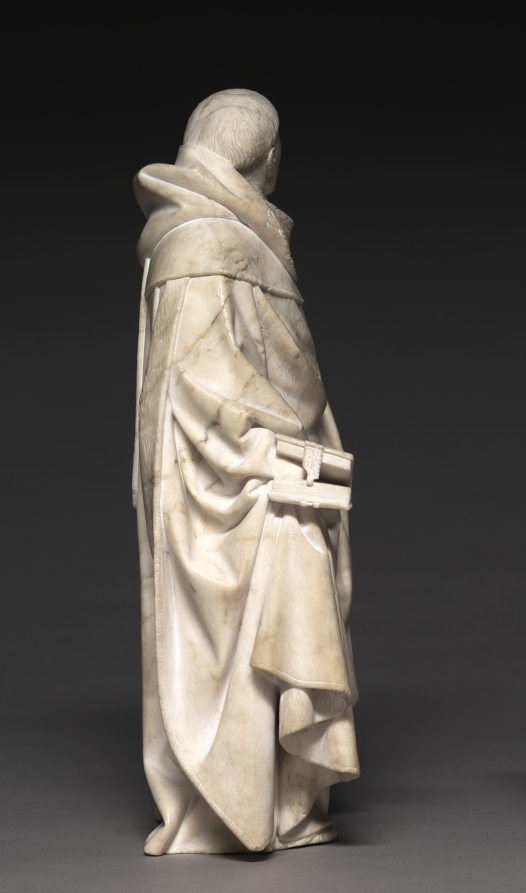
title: Mourner from the Tomb of John the Fearless and Margaret of Bavaria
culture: Spanish, Burgundy, Dijon, 15th century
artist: Jean de la Huerta (Spanish, active Burgundy, 1431–62)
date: 1443–45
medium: salins alabaster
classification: Sculpture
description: This monklike figure has a variously textured monochrome surface. Alabaster’s softness made it easy to carve details like the fabric and fur of the mourner’s robe and the codex pages in his hand. This is one of 40 mourners from an elaborate funeral procession beneath an intricately carved alabaster arcade. This mourner comes from the monastery of Champmol near Dijon, which became a primary burial place for Burgundian dukes. The sculpture was part of the tomb of John the Fearless (1371–1419), commissioned by his son Philip the Good (1396–1467), modeled after the earlier monument for Philip the Bold.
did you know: A plaster cast of this mourner adorns the Tomb of John the Fearless and Margaret of Bavaria in Dijon, France.